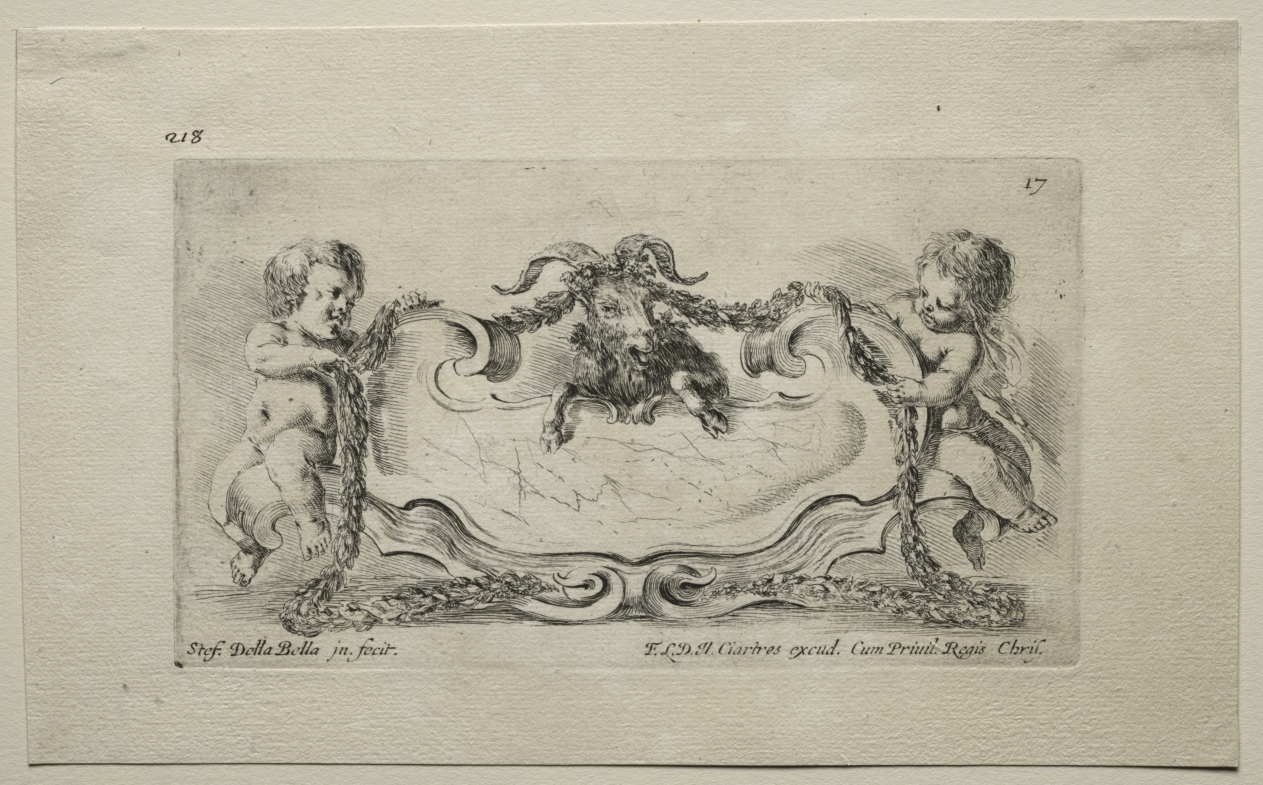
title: Collection of Various Caprices and New Designs of Cartouches and Ornaments: No 17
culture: Italy, 17th century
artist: Stefano Della Bella (Italian, 1610–1664)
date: 1646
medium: etching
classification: Print